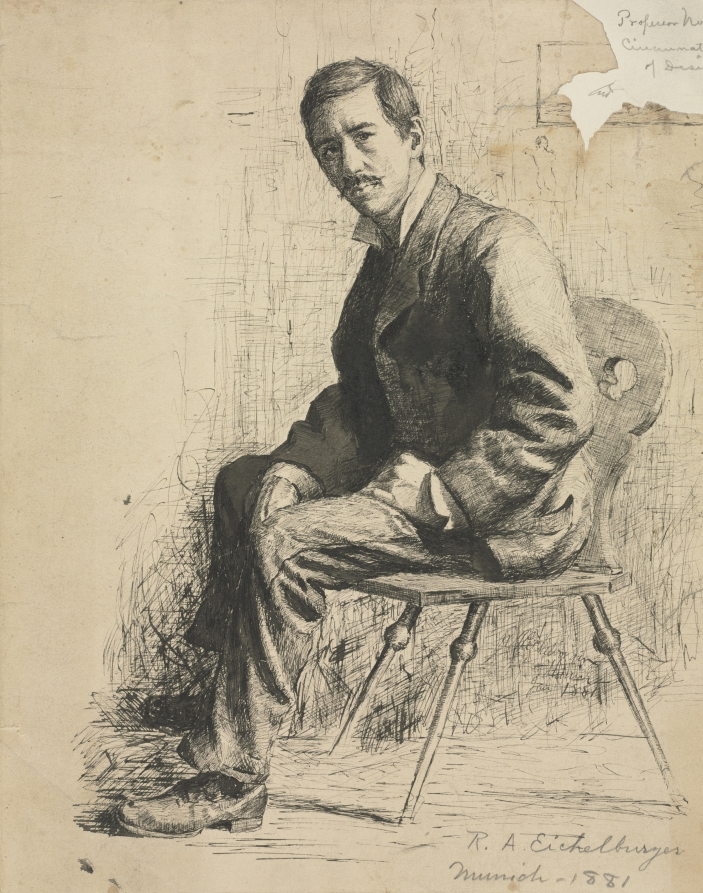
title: Sketch of Professor Mowotny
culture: America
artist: Robert A. Eichelberger (American, 1890)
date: 1881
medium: pencil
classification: Drawing